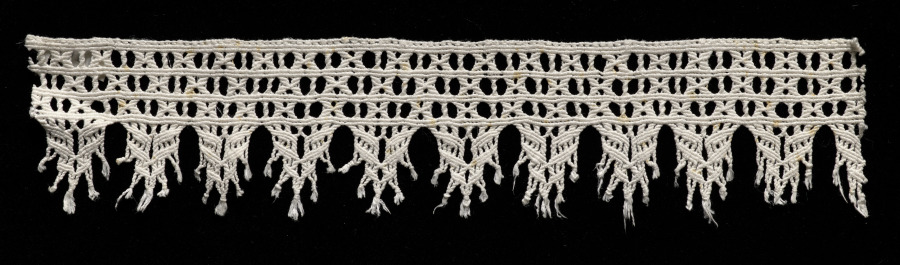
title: Fragment of Lace Edging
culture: Italy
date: 1500s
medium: Knotted lace edging and points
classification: Lace